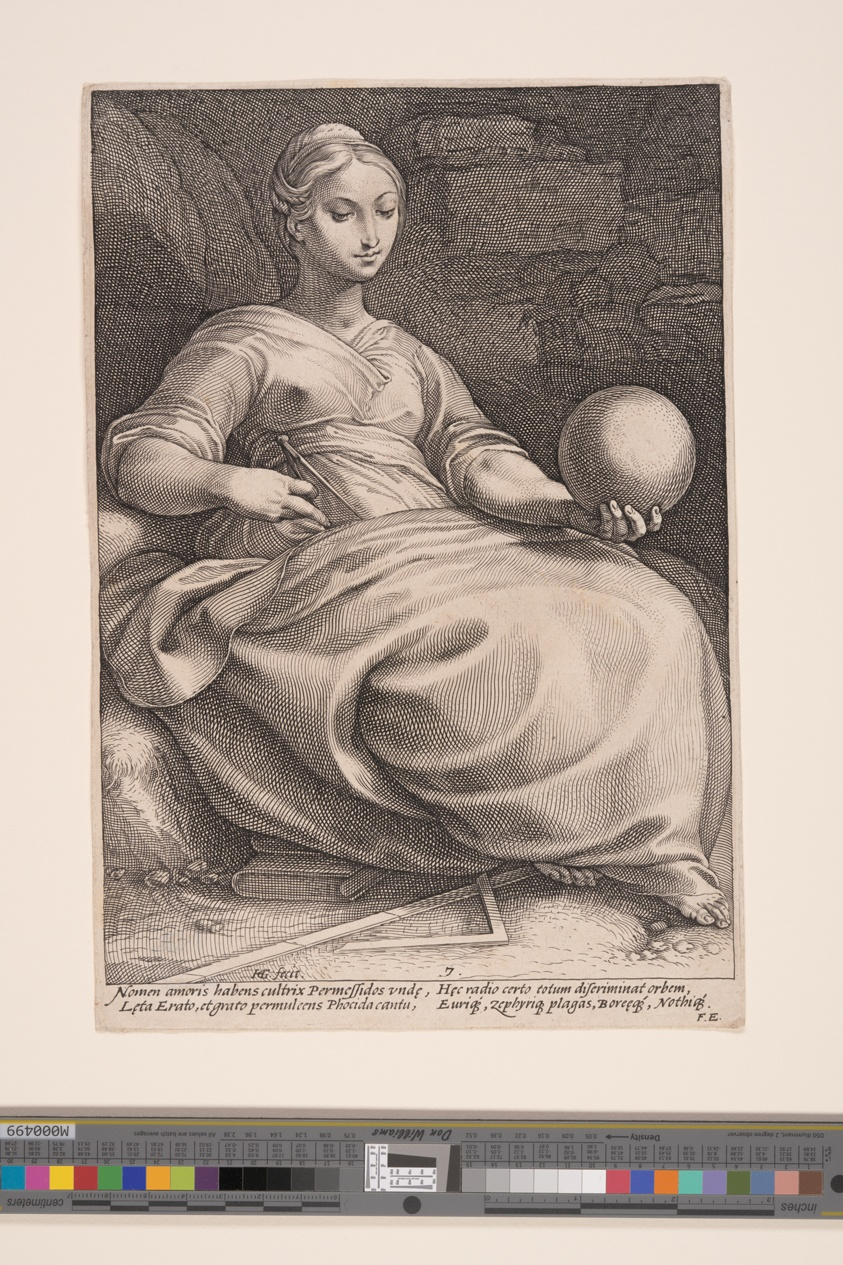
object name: Print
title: Erato, The Muse of Lyric Poetry, from The Nine Muses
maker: Hendrick Goltzius (Dutch, 1558–1617)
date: 1592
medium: Engraving on laid paper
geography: Netherlands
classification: print; engraving; paper; prints and drawing